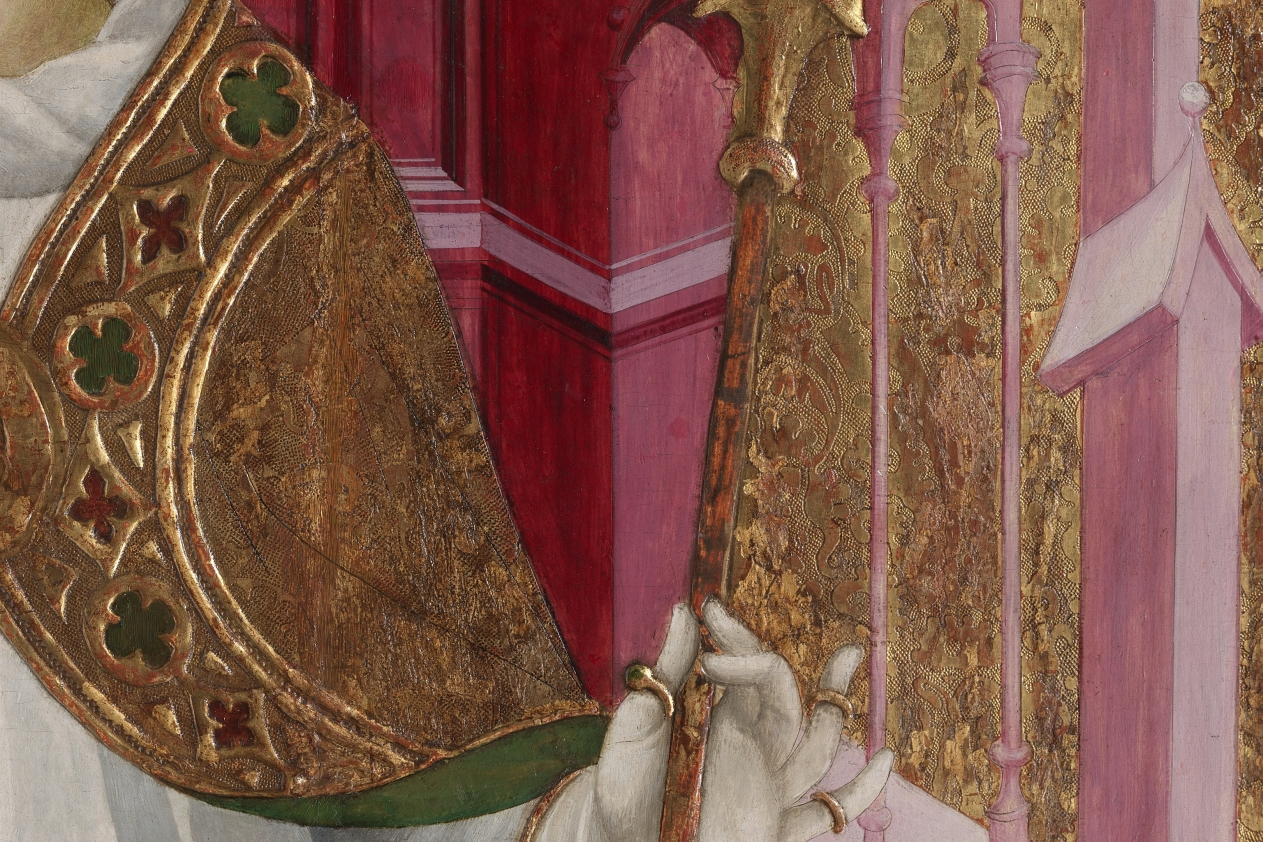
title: A Bishop Saint with a Donor (Saint Louis of Toulouse?)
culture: Spain, Catalonia, early 15th century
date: early 1400s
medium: tempera with raised and gilded gesso on wood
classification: Painting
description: The style of this painting suggests that it comes from Catalonia in northeastern Spain, though the identity of its artist remains unknown. The painting represents a youthful bishop-saint identifiable by a bishop’s symbols of authority, his miter and crozier. He wears rich vestments. Below, the figure in black represents the donor of the painting—likely a wealthy layperson rather than a cleric. The identity of the saintly bishop is speculated to be Saint Louis, Bishop of Toulouse, on the basis of his youth. Louis was consecrated Bishop of Toulouse in 1297, died six months later at the age of 23, and was canonized in 1317. His relics were moved in 1423 to Valencia and his cult flourished in Spain.